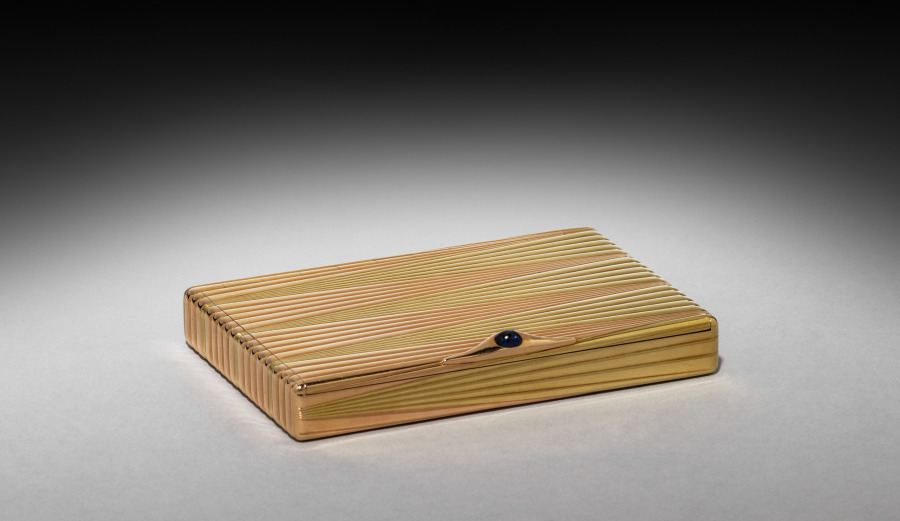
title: Cigarette Case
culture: Russia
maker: House of Fabergé (Russian, 1842–1918)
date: c. 1908–17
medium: gold, sapphire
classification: Silver